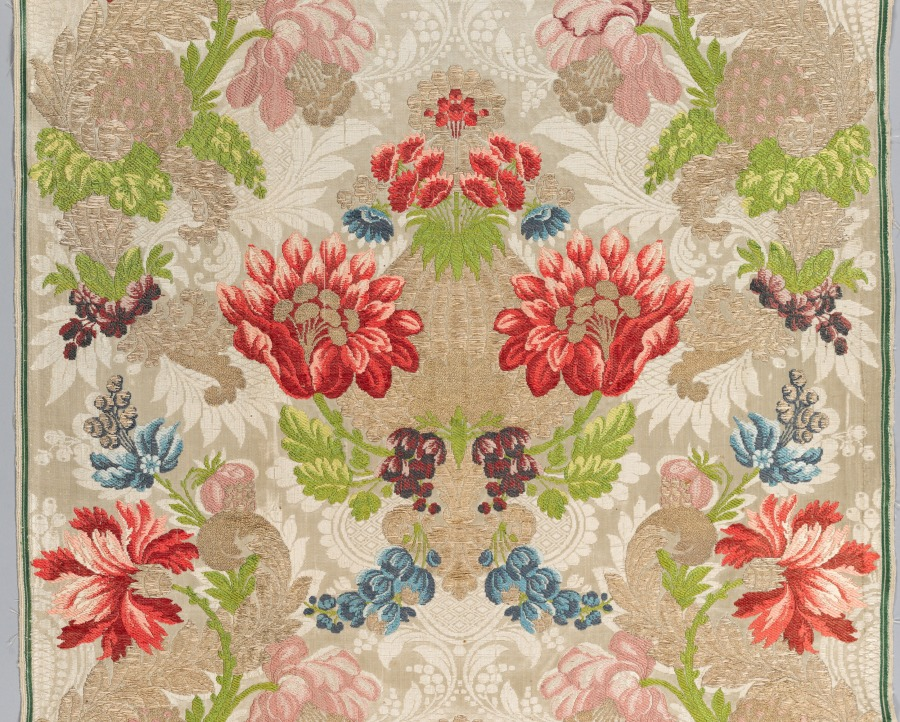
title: Length of Textile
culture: France or Italy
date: early 1700s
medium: brocade on satin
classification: Textile